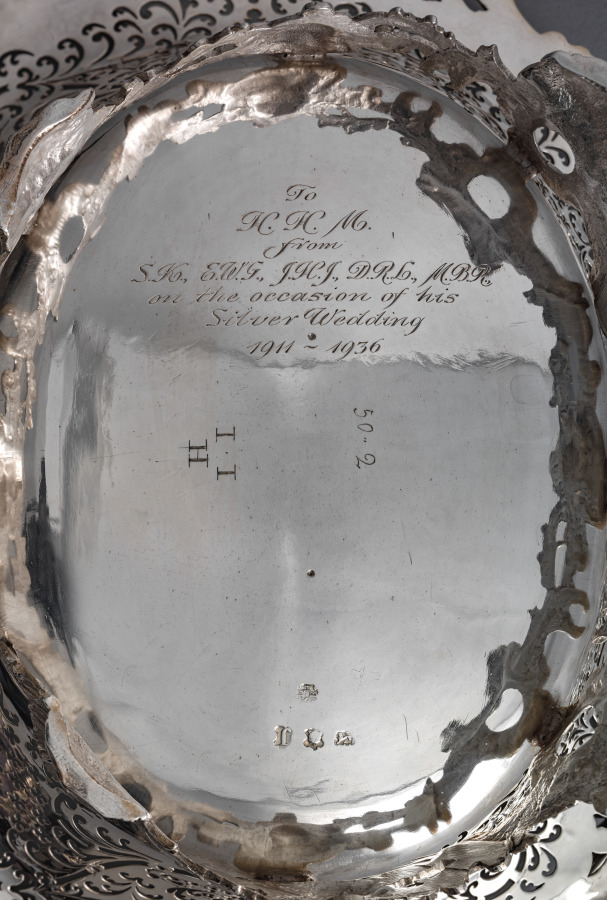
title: Cake Basket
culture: Britain, London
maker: Samuel Herbert and Company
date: 1753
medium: Silver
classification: Silver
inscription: “H/I I”; hallmark for London, George II, Samuel Herbert and Henry Bailey, and date 1753.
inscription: “To/H.H.M./from/S.K., E.W.G., J.H.J., D.R.L., M.B.R./on the occasion of his/Silver Wedding/1911-1936”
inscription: “50-2”; hallmark for London, George II, Samuel Herbert and Henry Bailey, and date 1753.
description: Drinking tea at the end of the day, accompanied by sweet cakes and savory delights, became an established ritual in Britain at all levels of society during the 1700s. In grand houses, silver teapots, caddies, and cake baskets elevated this afternoon refreshment to a formal gathering.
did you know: Sheaves of wheat adorning the rim of this basket allude to the flour used in pastries and cakes for tea.